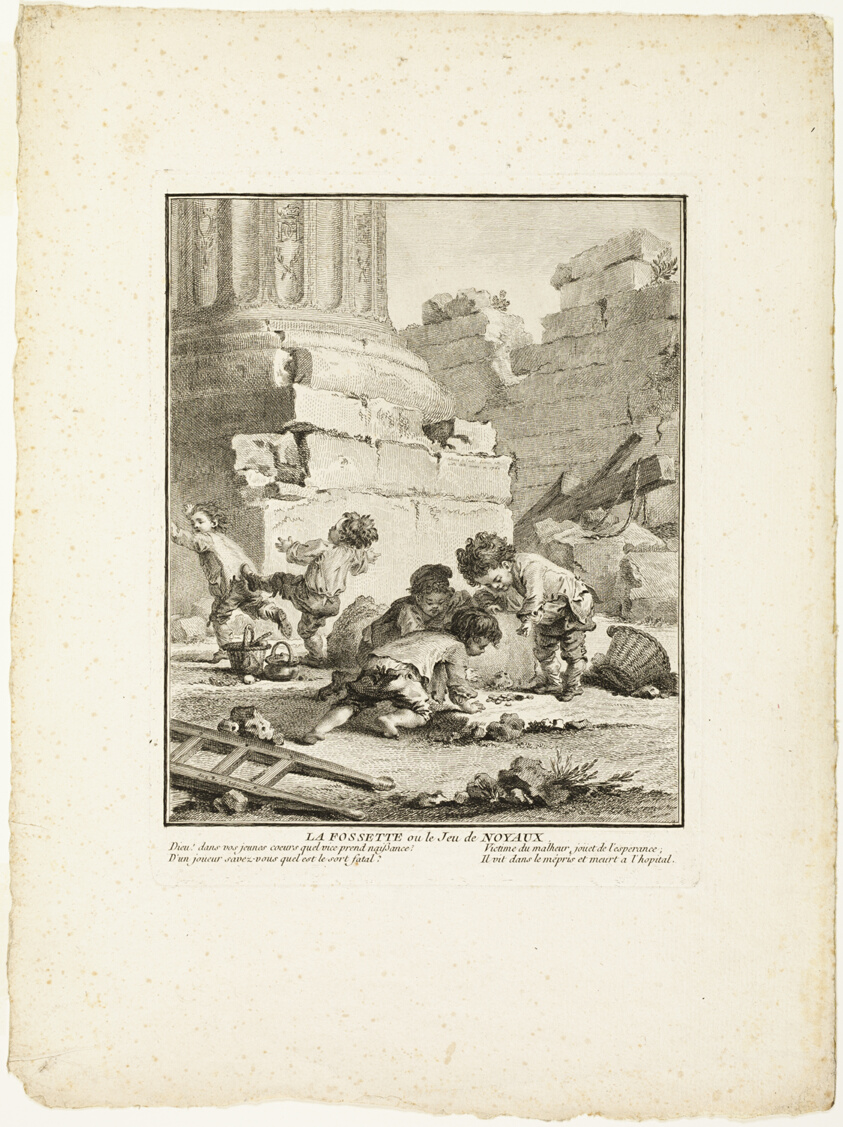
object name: Print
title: The Dimple, or The Game of Stones, from The Games of the Urchins of Paris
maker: Jean-Baptiste Tilliard (French, 1740–1813); after Augustin de Saint-Aubin (French, 1736-1807)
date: 1770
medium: Etching on ivory laid paper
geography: France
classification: etching; print; prints and drawing